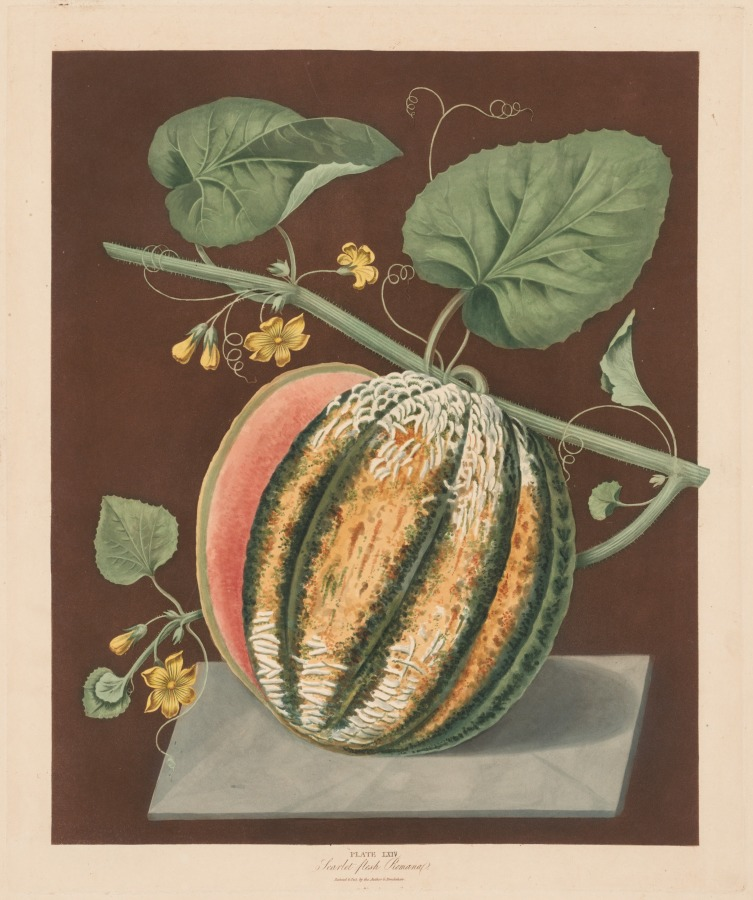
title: Pomona Britannica: No. 64 - Scarlet Flesh Romana Melon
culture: England, 19th century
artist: George Brookshaw (British, 1751–1823)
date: 1812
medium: aquatint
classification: Print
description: Pomona Britannica illustrates fruits cultivated at Hampton Court Palace’s gardens, the most celebrated around London. It was devoted to the most handsome varieties of fruit cultivated in England. Most of the 90 plates in this large and sumptuous book, like these, have dark aquatint backgrounds.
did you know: Melons belong to the gourd family, meaning they grow on vines and should be supported by stalks or trellises.